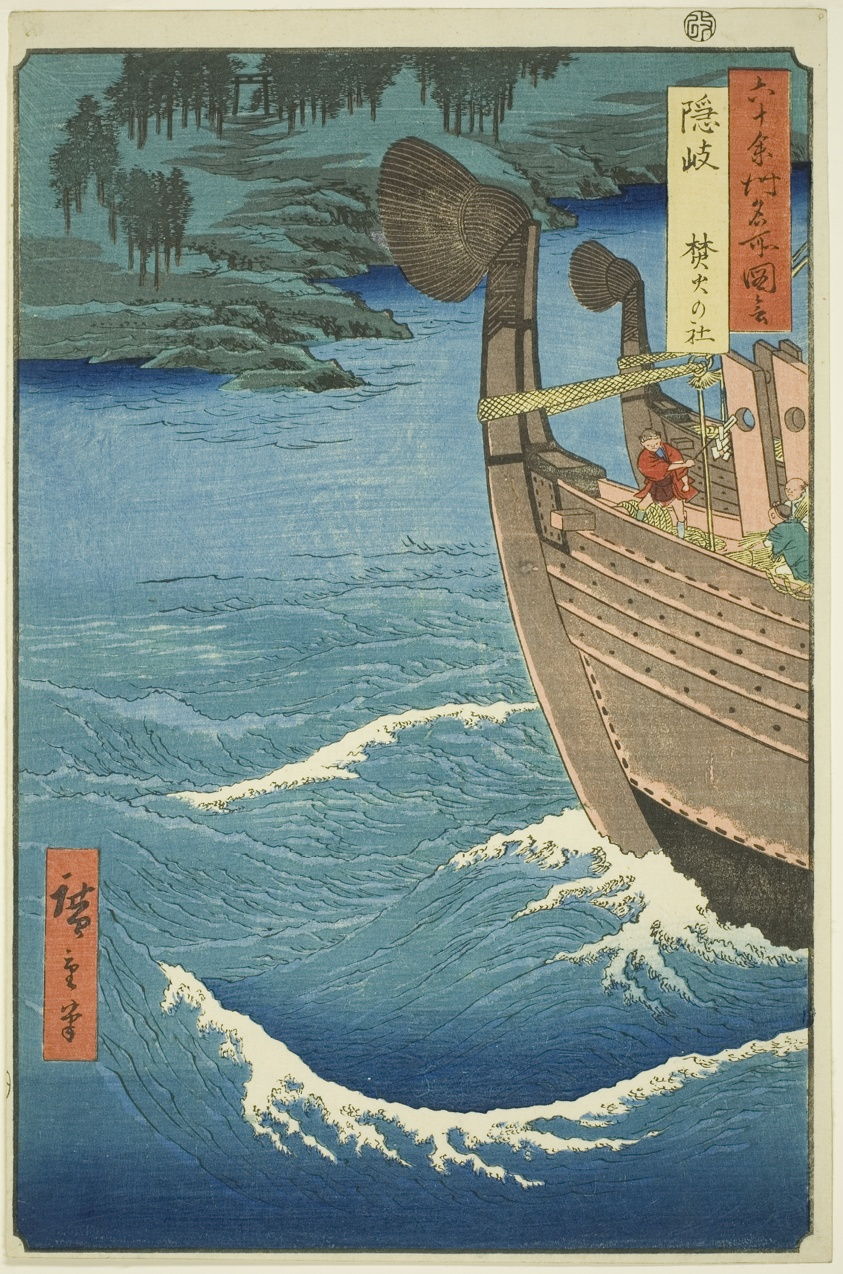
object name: Print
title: Oki Province: Takuhi Shrine (Oki, Takuhi no yashiro), from the series "Famous Places in the Sixty-odd Provinces (Rokujuyoshu meisho zue)"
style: Japanese (culture or style)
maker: Utagawa Hiroshige 歌川 広重; Japanese, 1797-1858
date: 1853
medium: Color woodblock print; oban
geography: Japan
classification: woodblock print; print; asian art